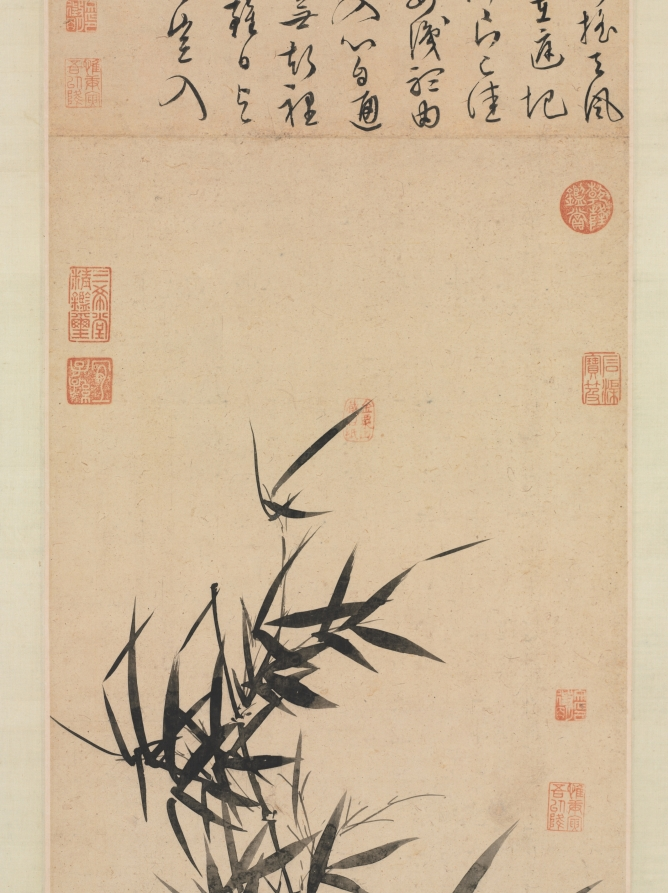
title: Listening to the Bamboo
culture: China, Ming dynasty (1368–1644)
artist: imitator of Wen Zhengming (Chinese, 1470–1559)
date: late 1400s-1500s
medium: hanging scroll, ink on sutra paper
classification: Painting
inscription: Artist's inscription, signature, and 2 seals on the separate sheet of paper above the painting: In the empty studio sitting in deep loneliness;/ Like cool sound sending pure beauty,/ Or pendants swinging in the wind,/ Or a solitary qin suggesting running water./ Where is that sound from?/ The green poles in the courtyard,/ Clear and light like an echo,/ The sound and ears are in tune./ The sound of bamboo now very beautiful;/ My ears are also clear./ Who says the sound is in the bamboo?/ To know it depends on oneself./ A noble person is like a tall bamboo;/ A thin bamboo is like the noble man./ When the sound enters, the mind responds,/ Only one thing but artificially separated./ A bystander searching for the sound,/ But the sound can only be found in silence./ Otherwise I am still I,/ Bamboo is still bamboo./ Even if I live with bamboo every day,/ Still the music will be a thousand miles away./ Look at sound's most primeval source:/ Did it enter a zither or a lute? Composing a poem on Listening to the Bamboo. Written by Zhengming at the Ting yun guan. Wen Zhengming [2 seals] Wen Zhengming yin 文徵明印; Wei geng yin wu yi jiang 惟庚寅吾以降.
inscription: [印] 文徵明印; 惟庚寅吾以降.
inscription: 5 seals of the Qianlong emperor (r. 1736-95)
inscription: [印] 金粟山藏經紙